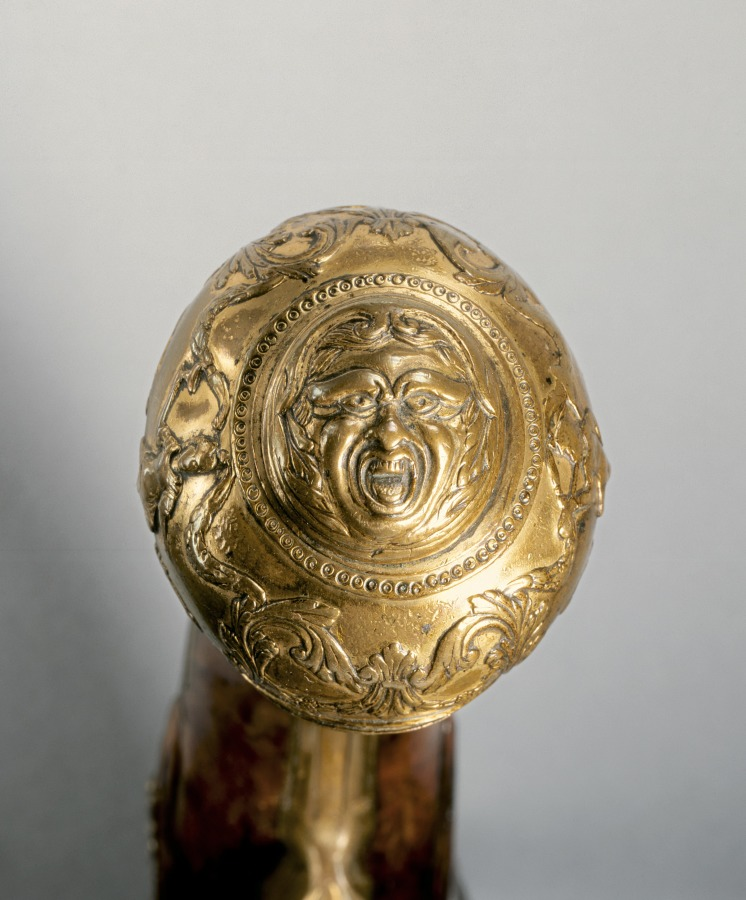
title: Pair of Flintlock Pistols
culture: Franco-Flemish, Liège, early 18th century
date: early 1700s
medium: steel with gold inlay, gilt-brass mounts; walnut burl stock; chiseled high-relief decoration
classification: Arms and Armor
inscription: G. MASSIN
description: Works of exquisite craftsmanship, this pair of pistols, on view in the museum’s armor court, feature an array of decorative elements, including carved walnut, gold inlay, and chiseled, engraved, and gilded figural designs. The barrel is signed G. MASSIN, the name of a gunsmith working in eastern France or French-speaking Flanders, possibly the city of Liège.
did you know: The flintlock ignition system was developed in the 1600s and remained the dominant system until the early 1800s.